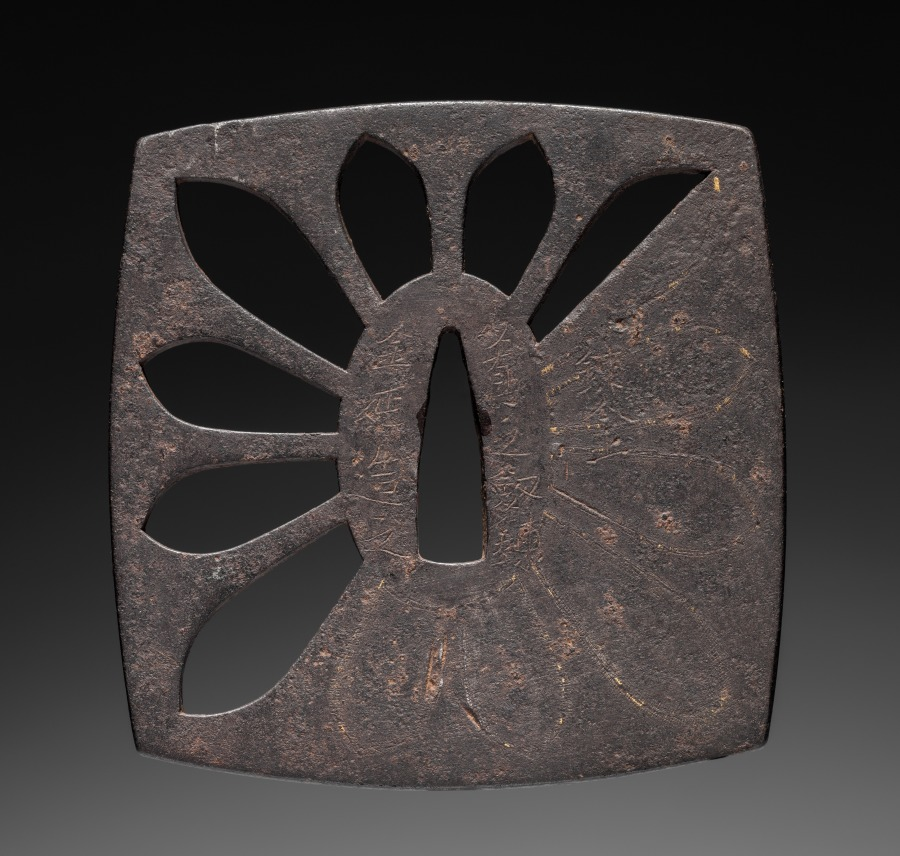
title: Sword Guard (Tsuba)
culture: Japan, possibly Edo period (1615-1868)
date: c. 1615–1868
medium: iron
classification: Arms and Armor